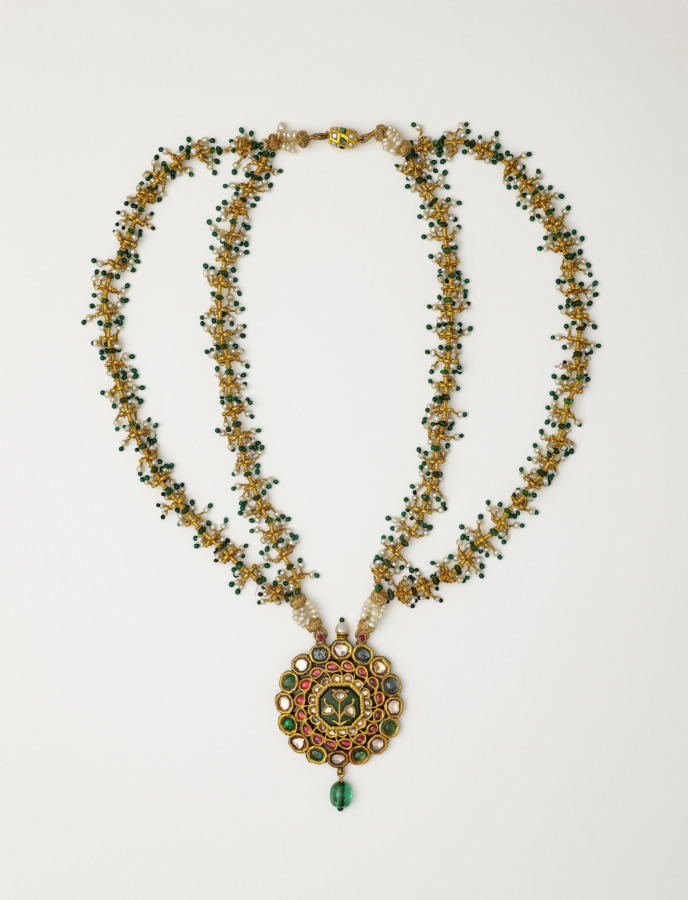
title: Necklace and Pendant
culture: India, Delhi in the Punjab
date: before 1916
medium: gold, enamel and gems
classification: Jewelry